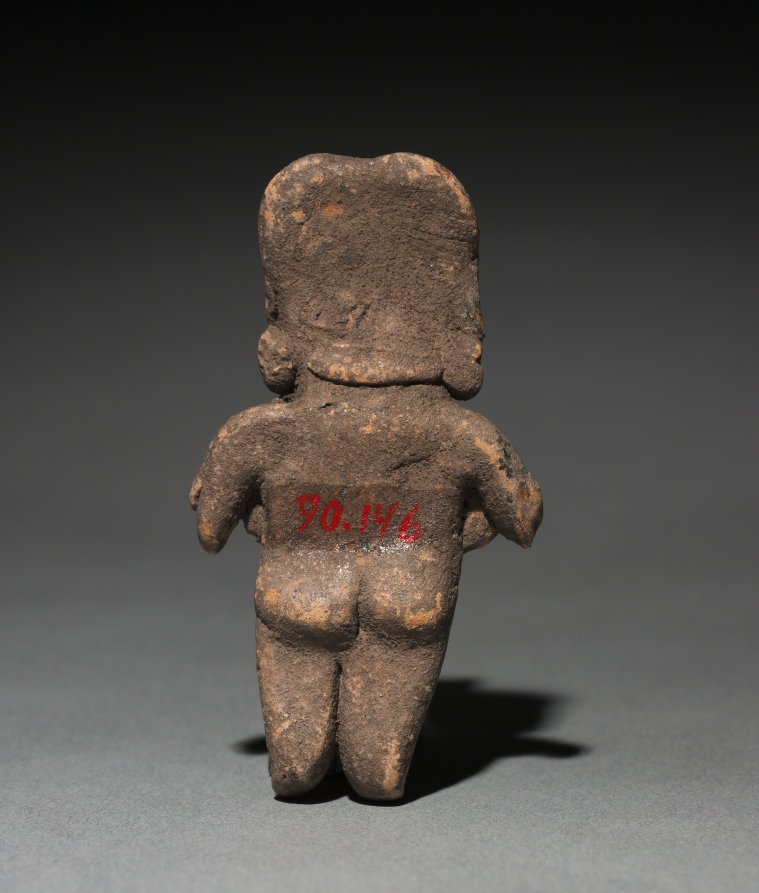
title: Female Figurine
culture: Mexico, Chupíuaro, Guanajuato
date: 400–100 BCE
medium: pottery with traces of white pigment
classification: Sculpture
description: The Chupícuaro culture, located north of Mexico City in the state of Guanajuato, created a distinctive ceramic tradition including small clay figurines. This example is said to belong to a group of ten figurines from the same burial or cache (1990.145–154). The group includes both males and females that can be sorted into couples based on size.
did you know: Groups of figurines were sometimes arranged in scenes and likely used in household rituals.